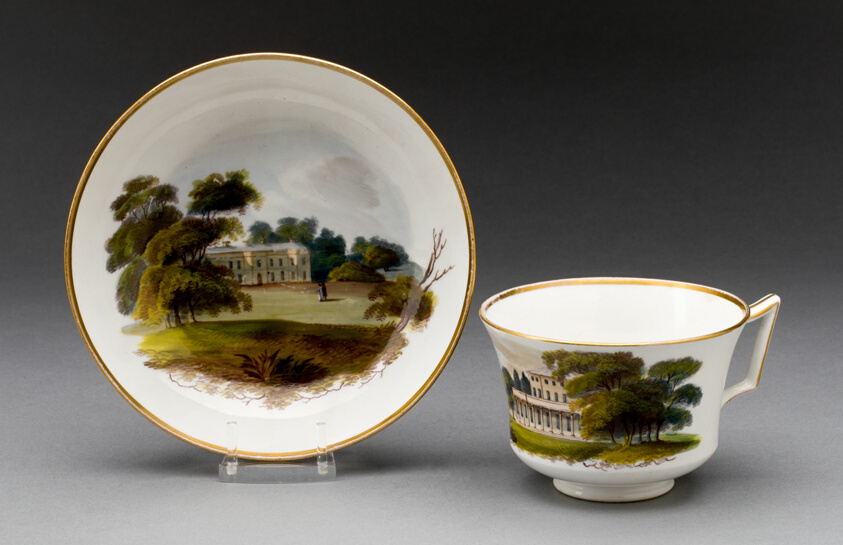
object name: Ceramics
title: Cup and Saucer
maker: Wedgwood Manufactory (England, founded 1759)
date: c. 1815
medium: Porcelain with polychrome enamels and gilding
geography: Burslem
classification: drinking vessel; teaware; porcelain; european decorative arts; ceramics